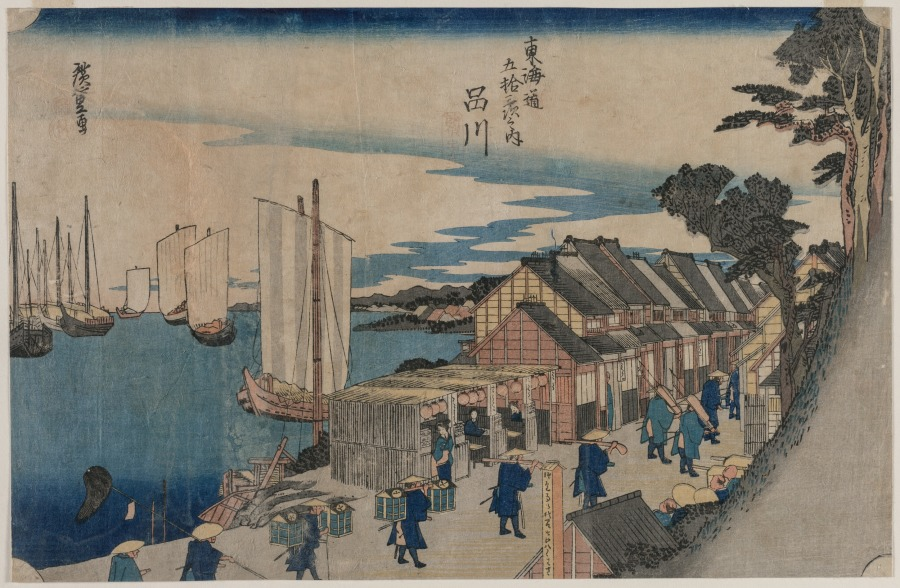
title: Shinagawa (from the series Fifty-three Stations of the Tokaido)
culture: Japan, Edo period (1615–1868)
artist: Utagawa Hiroshige II (Japanese, 1826–1869)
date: 1797–1858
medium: color woodblock print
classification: Print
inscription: Signature: Hiroshige Gwa Censorship Seal: kiwame Publisher Seal: Take